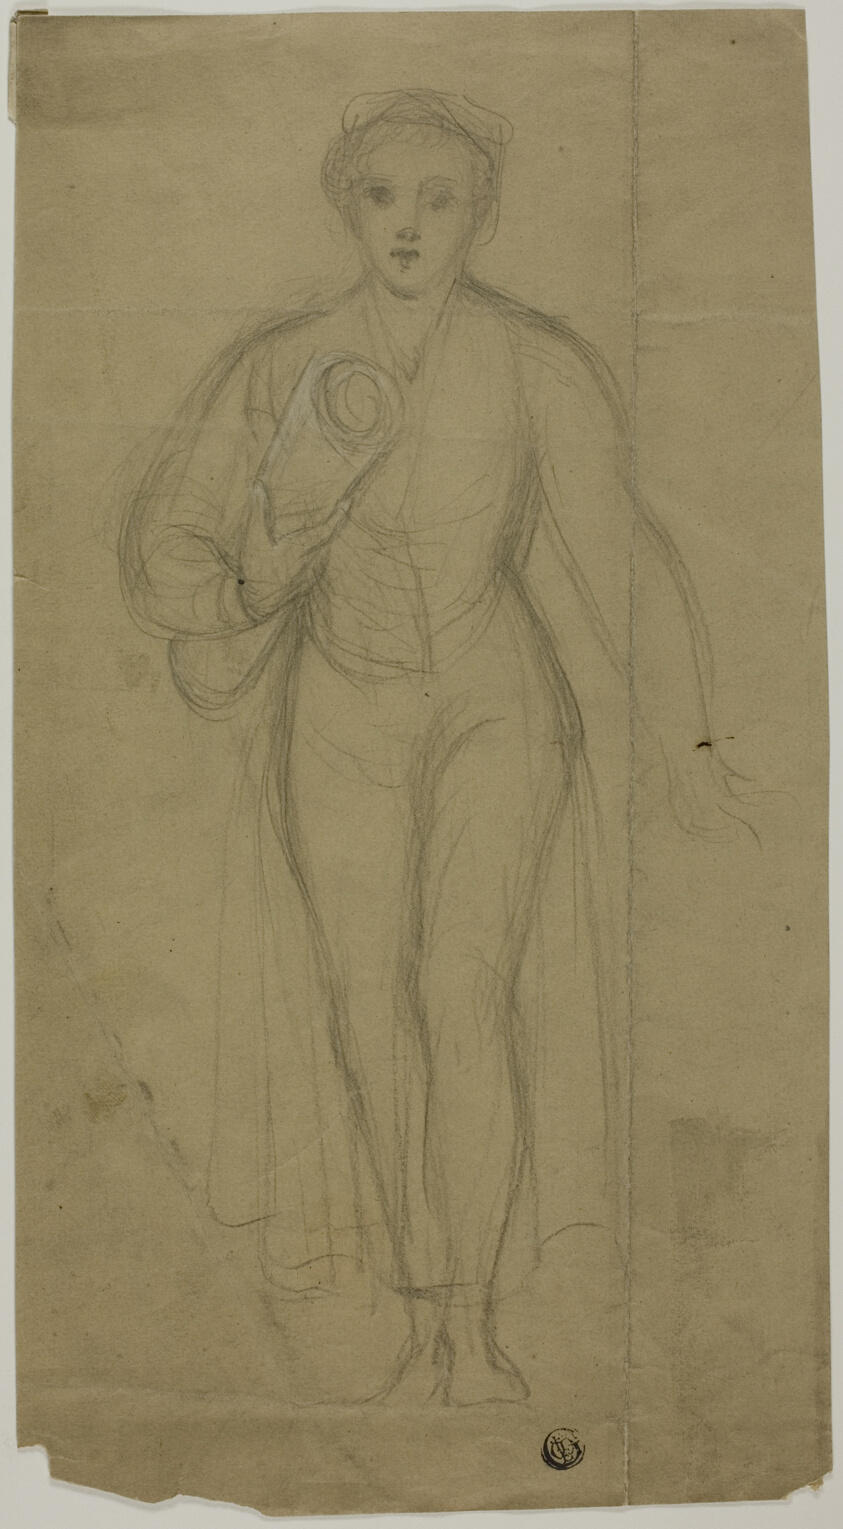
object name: Drawing and Watercolor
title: Standing Woman Carrying Rolled-Up Paper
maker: Unknown Artist; American, n.d.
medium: Black chalk, heightened with touches of white chalk, on tan wove paper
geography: United States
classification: graphite; drawings (visual works); prints and drawing